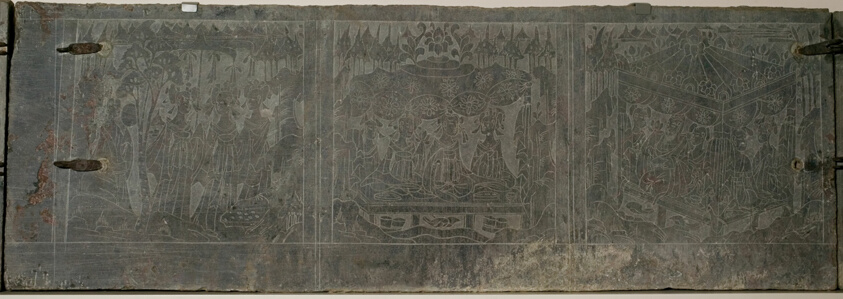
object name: Religious/Ritual Object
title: Panels from a Funerary Couch (Guanchuang)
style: Chinese (culture or style)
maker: China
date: Northern Wei dynasty (386–535); c. 525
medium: Limestone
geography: China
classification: stone; sculpture; asian art; ritual objects